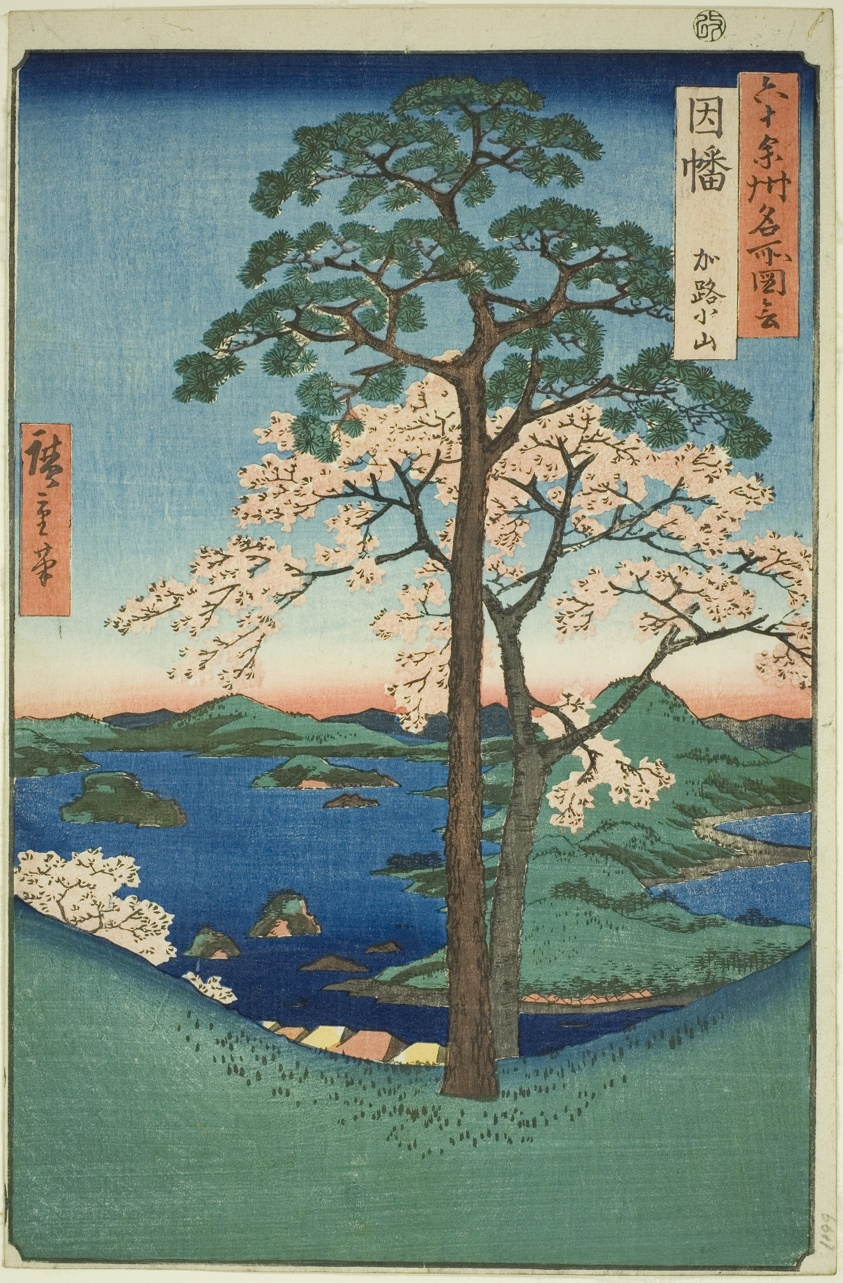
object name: Print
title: Inaba Province: Karo, Koyama (Inaba, Karo Koyama), from the series "Famous Places in the Sixty-odd Provinces (Rokujuyoshu meisho zue)"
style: Japanese (culture or style)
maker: Utagawa Hiroshige 歌川 広重; Japanese, 1797-1858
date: 1853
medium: Color woodblock print; oban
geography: Japan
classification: woodblock print; print; asian art